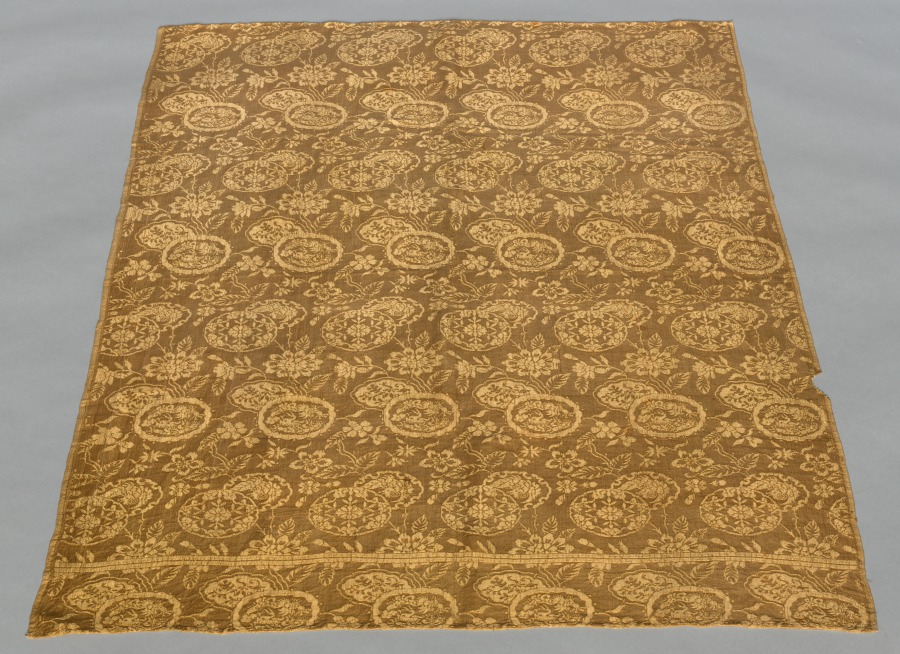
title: Fragment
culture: China, 19th century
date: 1800s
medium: silk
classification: Textile